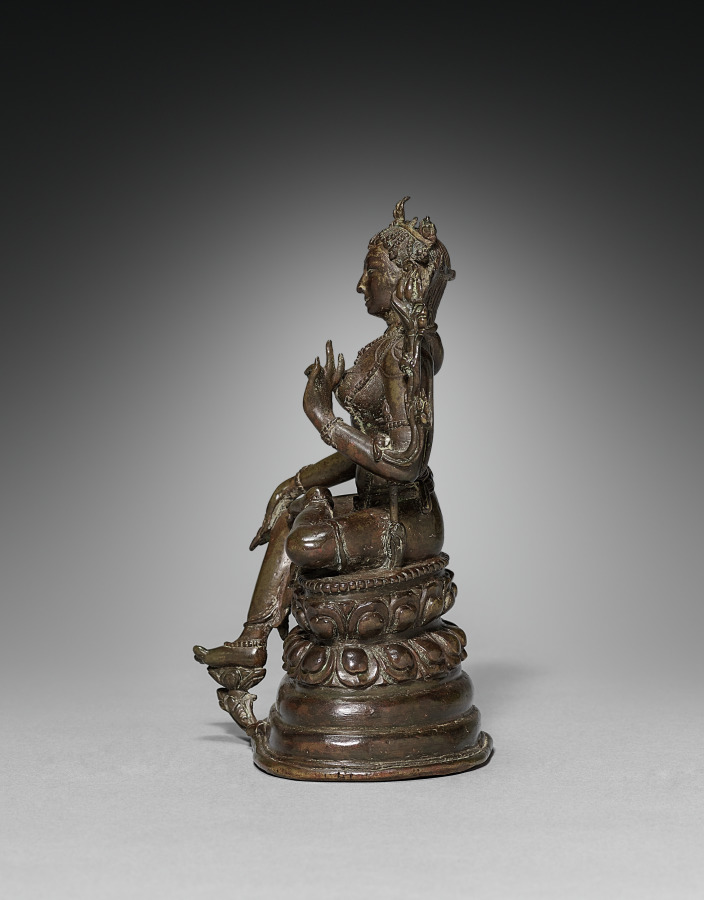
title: Seated Tara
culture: India, Bengal, late Pala dynasty, 12th Century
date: 1100s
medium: bronze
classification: Sculpture